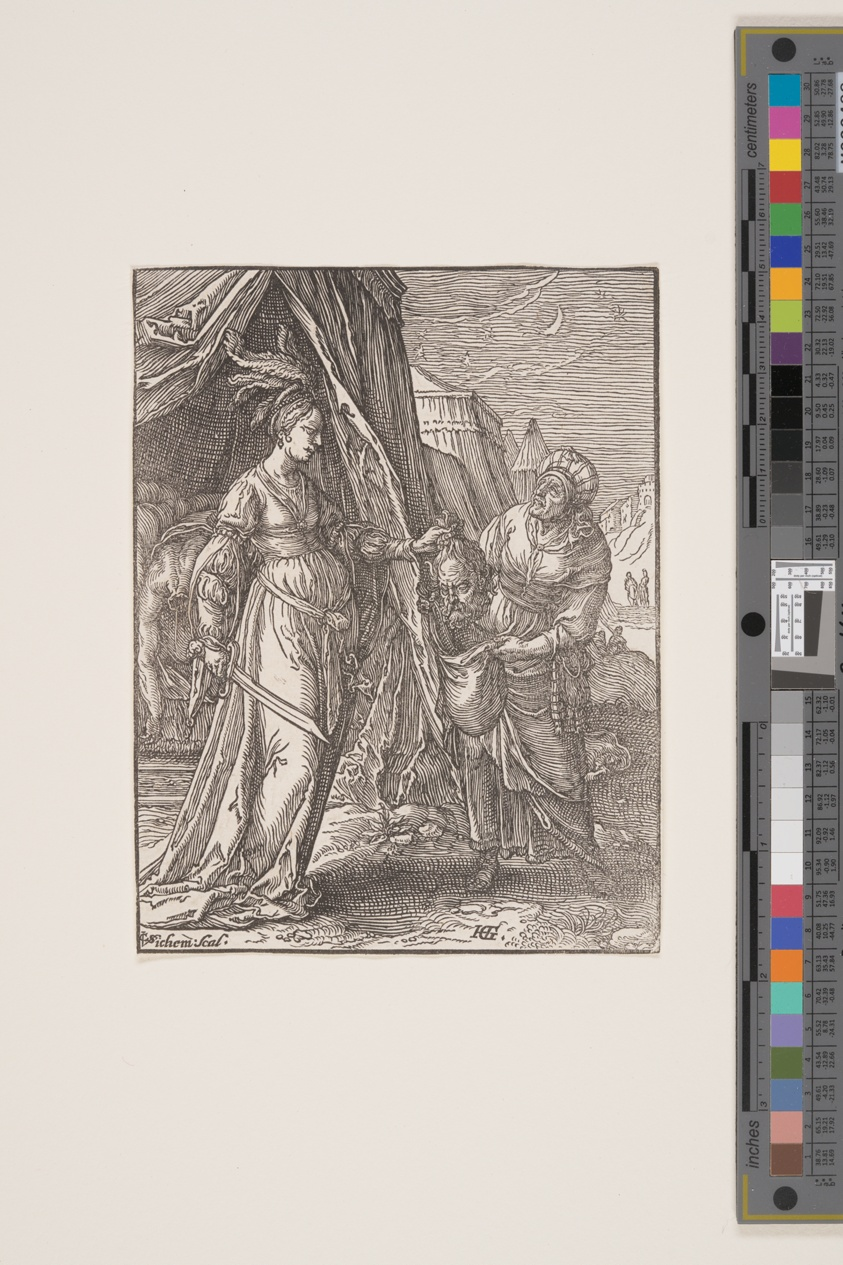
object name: Print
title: Judith with the Head of Holofernes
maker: Christoffel van Sichem I (Dutch, 1546-1624); after Hendrick Goltzius (Dutch, 1558–1617)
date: c. 1600-1610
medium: Woodcut on laid paper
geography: Netherlands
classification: woodcut; paper; print; prints and drawing